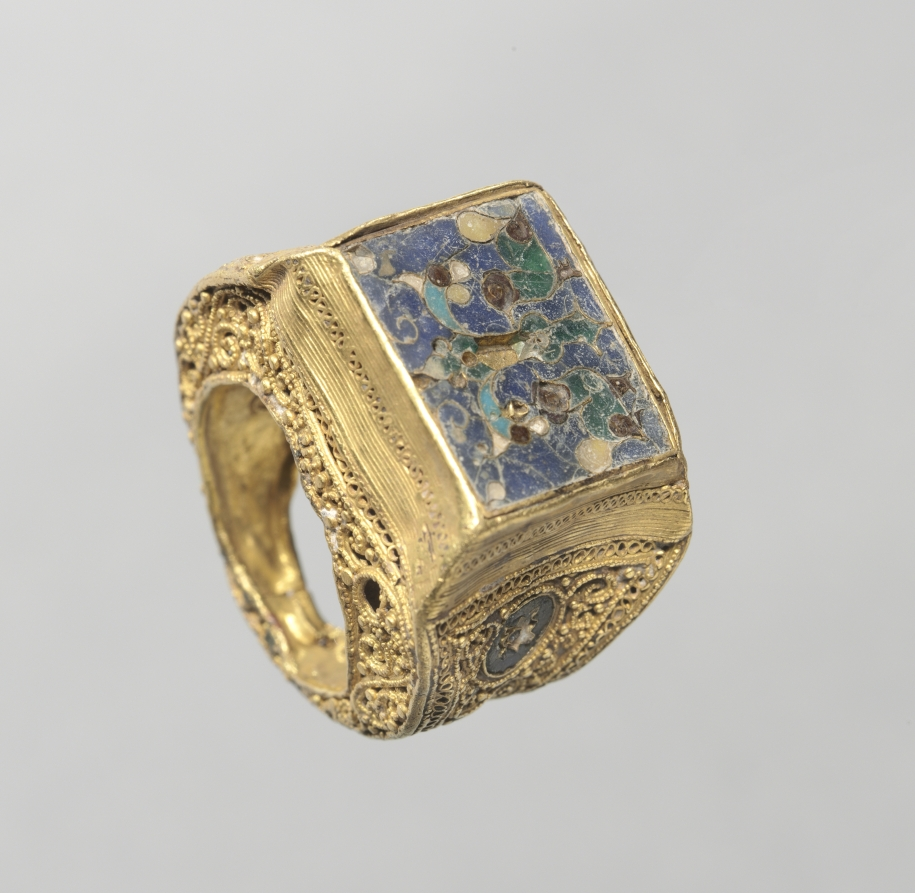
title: Ring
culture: Byzantium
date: 800s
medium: gold, filigree and cloisonné enamel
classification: Jewelry